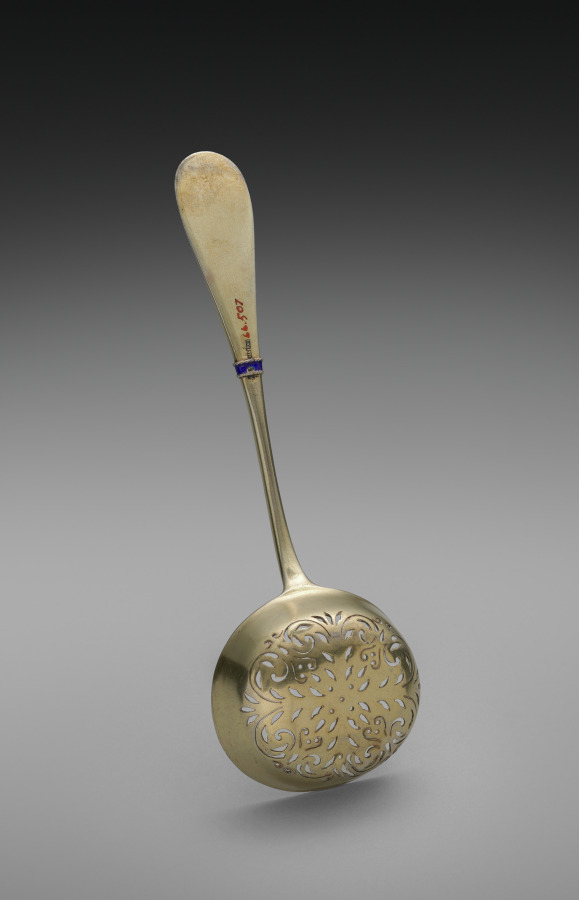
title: Jam (Varenye) Sifter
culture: Russia, St. Petersburg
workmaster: attributed to Feodor Ivanovich Rückert (Russian, 1840–1917)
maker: House of Fabergé (Russian, 1842–1918)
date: 1887–96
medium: silver gilt, opaque cloisonné enamel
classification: Miscellaneous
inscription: 84, St. George? [assay mark for Moscow, 1882-1896]; C. Fabergé (in Cyrillic); double-headed eagle? [imperial warrant].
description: This sifter, which accompanies the little basket in this tea set, is a particularly Russian component of this service meant to strain the fruit preserved in a sweet juice, called varenye. At Russian tea, varenye was strained and served over cakes or biscuits in a similar way that the English take jam with scones at high tea.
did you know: This jam (varenye) sifter is part of a larger tea service.